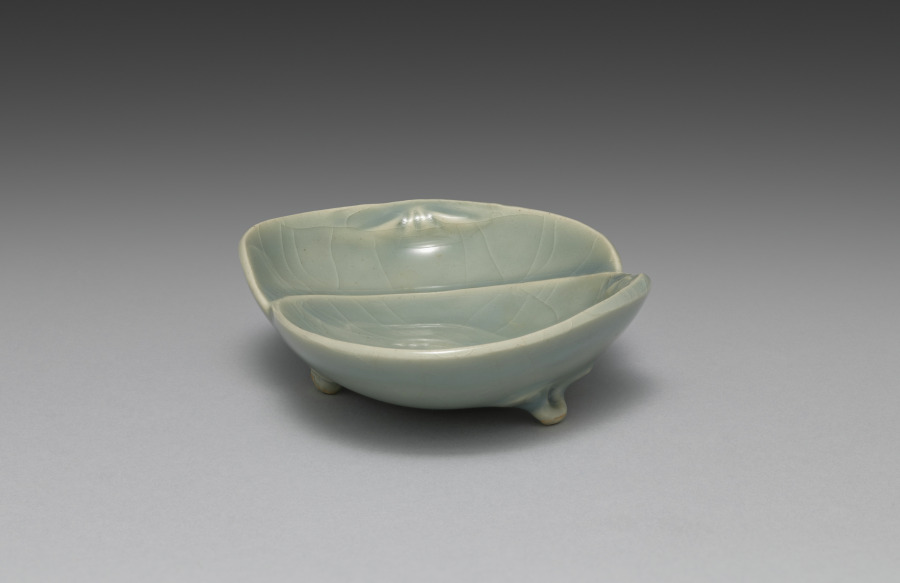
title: Dish from Saucers with Matching Shells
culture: Japan, Meiji period (1868–1912)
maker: Seifū Yohei III (Japanese, 1851–1914)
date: 1893–1914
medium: Porcelain with molded design and green crackled glaze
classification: Ceramic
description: Yohei III’s main output for his sophisticated clientele was in the form of tea sets and dining sets. He created a range of dishes in green glazes. He often produced in pairs, sets of five, or sets of ten. The set of five dishes with a more complex form is described as having a “water-colored glaze” (mizuiroyū). These are shaped like clam half shells, a reference to a game in which shell halves painted with narrative scenes or a variety of motifs must be matched back together by the players. The dishes have molded details to articulate the shell forms, and the crackling across each shell adds another dimension to the surface. Each dish is set on three small feet, formed by a pinched piece of clay and attached to an unglazed area on the underside of the dish. Curiously, while four of the dishes are stamped with the artist’s mark, one has instead a signature carved into the base.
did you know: Each of the paired-shell dishes has its own compartment in a long, flat box.